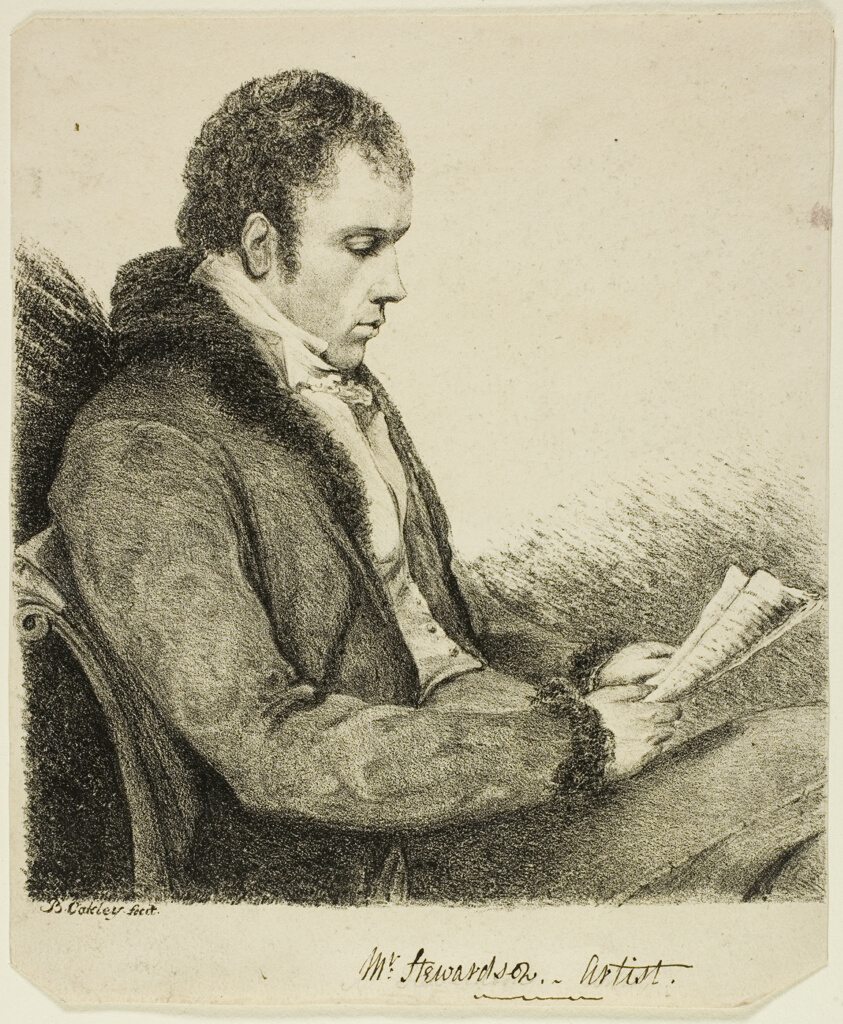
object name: Print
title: Mr. Stewardson the Artist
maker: B. Oakley (Unknown, 18th-19th century)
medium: Lithograph in black on paper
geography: Unknown Place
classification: lithograph; print; prints and drawing